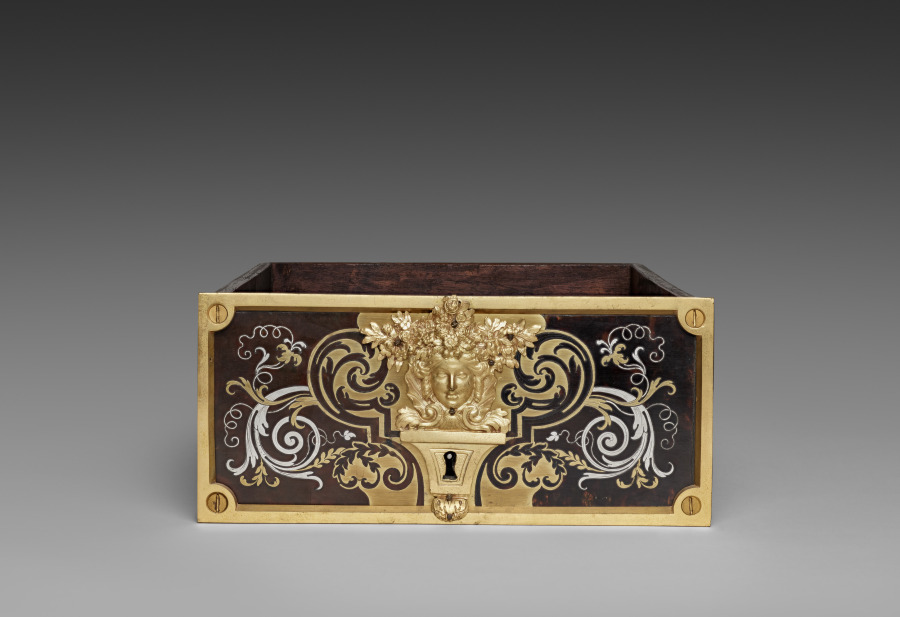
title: Side Drawer for Cabinet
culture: France, late 17th Century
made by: André-Charles Boulle (French, 1642–1732)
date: c. 1690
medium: ebony, marquetry in metal and tortoise shell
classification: Furniture and woodwork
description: Appointed cabinetmaker to King Louis XIV in 1672, André-Charles Boulle became a master of furniture making in France during the late 1600s until his death in 1732. Known primarily for his use of marquetry, in which metal patterns are inlaid into tortoiseshell then applied within the veneered surface of the furniture, Boulle established a level of quality and craftsmanship few others could achieve. As a result, his work found favor at the royal court and among other aristocrats and diplomats eager to impress the king. The inclusion of a medallion depicting Louis XIV within the bronze decoration of this chest would have identified the owner with the royal court. Often exhibiting stout architectural proportions with elegant groups of inlaid motifs such as the parrot on the central panel of this chest, Boulle’s designs are an example of the intellectual fashion for contrasting ideas, materials, and motifs.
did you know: Originally designed to sit atop an elaborate tall stand, this chest was likely altered in the late 1700s to reduce its scale and height.